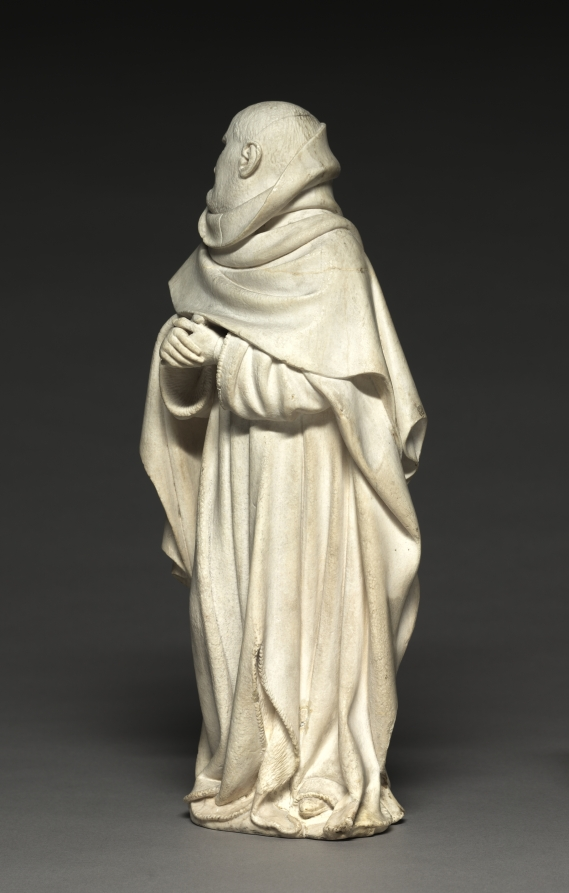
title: Mourner from the Tomb of Philip the Bold, Duke of Burgundy (1364–1404)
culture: Netherlands, active Dijon, 15th century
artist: Claus de Werve (Netherlandish, 1380–1439)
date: 1404–10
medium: vizille alabaster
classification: Sculpture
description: This figure comes from the tomb of Duke Philip the Bold from the church of Champmol near Dijon (Burgundy, France). Philip, who founded the monastery and designated it as his burial place, hired the best artists, many of whom came from the Netherlands. While the commission was given in 1381, the work was not completed until 1410, six years after the duke’s death. This mourner is unusual for the time because it is not carved as a static low relief on the pedestal of the tomb but interact with the viewers and their fellow procession members. The lifelike quality of the figure is due in large part to the alabaster. Its softness allowed artists to carve details into the material, and the transparent, milky white stone could also be polished to a high gloss.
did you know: The use of alabaster in the late Middle Ages began in the 1300s with court art in the circles of French kings, especially in the field of funerary sculpture.